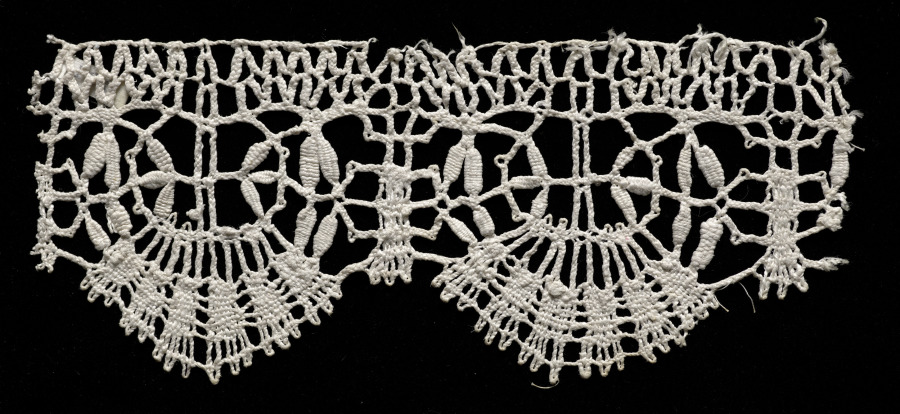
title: Lace Edging with Bell Points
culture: Italy, Genoa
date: 1680–99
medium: Bobbin lace (rose lace)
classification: Lace